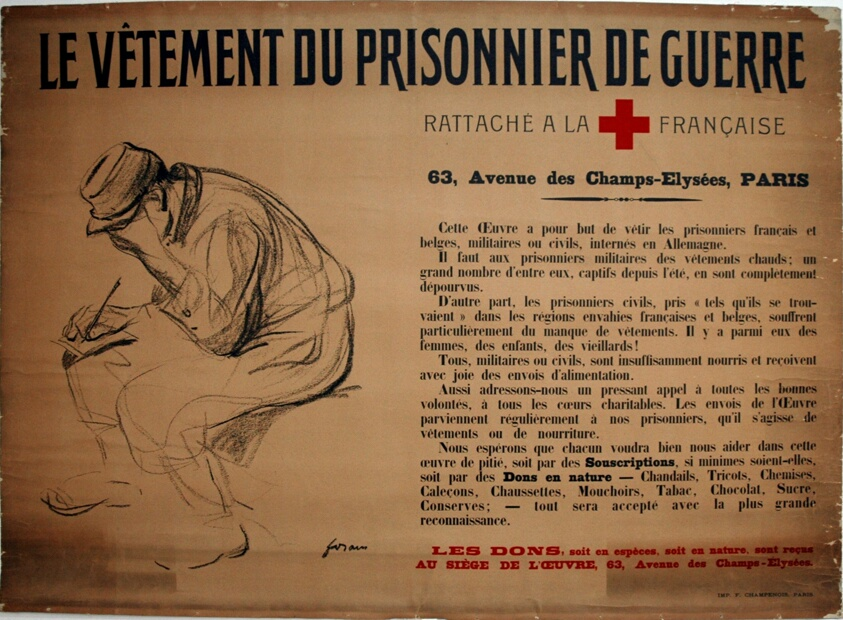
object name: Print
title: The Clothing of the Prisoner of War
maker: Jean Louis Forain (French, 1852-1931); printed by F. Champenois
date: c. 1915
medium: Color lithograph on cream wove paper, laid down on linen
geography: France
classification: lithograph; print; prints and drawing